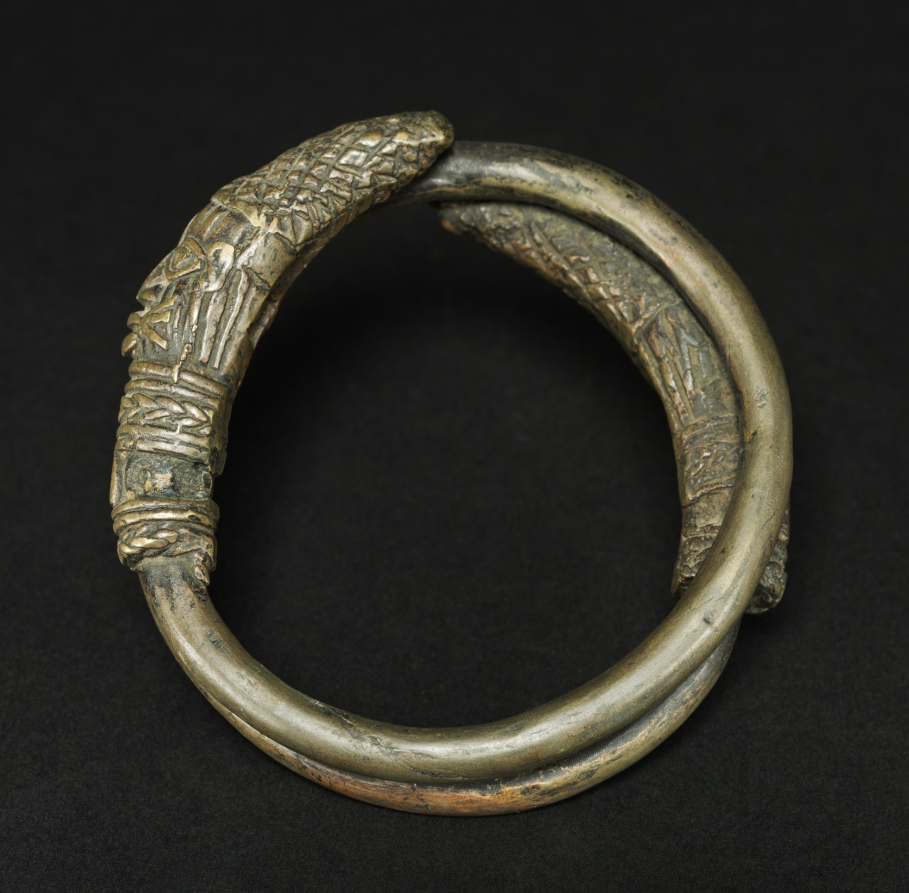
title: Hand Coil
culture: Nigeria, Benin Kingdom, Ẹdo peoples, members of the Igun Eronmwon (royal brasscasters) guild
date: 1800s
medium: Copper alloy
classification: Implements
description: While this looks like a bracelet, it wasn’t worn around a wrist. A chief or titleholder grasped this “hand coil” vertically during the annual Iguẹ festival, during which such men reaffirm their relationship to the Ọba, whose mystical powers are strengthened. An image of a man’s head caps each end of the thick, twisted metal. Repeated human touch rubbed the undecorated lengths bright and shiny. Though small, the coil’s detail is enormous: to capture it, the artist incised the designs in wax during the casting process. They show these men are elites, with necklaces, caps, and whisker-like facial markings.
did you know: This is a unique object; it was made using the lost-wax casting technique, which destroys the wax mold in the creation process.